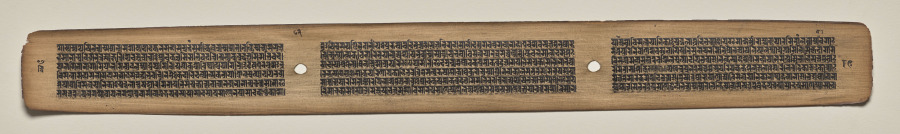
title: Text, Folio 82 (verso), from a Manuscript of the Perfection of Wisdom in Eight Thousand Lines (Ashtasahasrika Prajnaparamita-sutra)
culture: Eastern India, Bihar, Vikramashila Monastery. Painting: Nepal, Kathmandu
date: Sunday, September 14, 1119 (year 239 of the Newar Samvat in the month of Ashvina)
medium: gum tempera and ink on palm leaves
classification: Painting